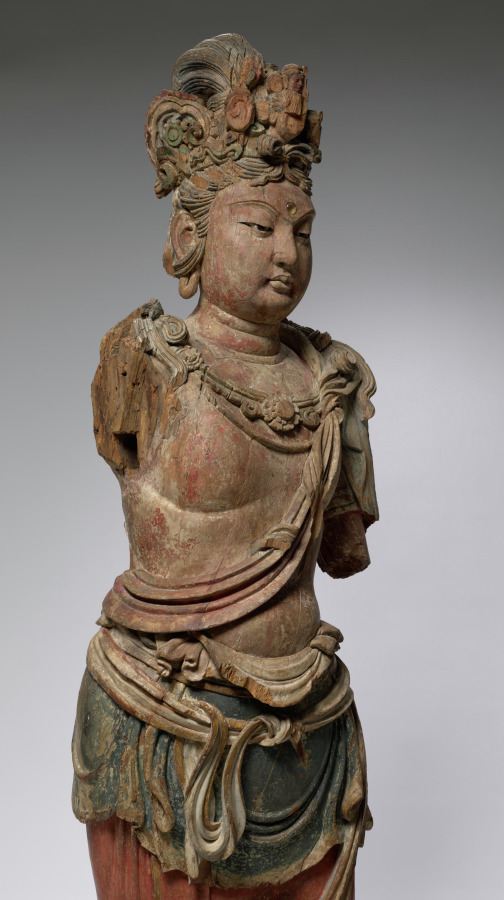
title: Eleven-Headed Guanyin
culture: China, late Northern Song dynasty (960-1127) - Jin dynasty (1115-1234)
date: 1100–1200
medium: wood with polychromy and cut gold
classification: Sculpture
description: The bodhisattva is an enlightened being dedicated to the spiritual awakening of all beings. The compassionate bodhisattva Guanyin, in a variety of manifestations, is probably the most popular deity of worship in Chinese Buddhism. In the Esoteric Buddhist form shown here, this standing Guanyin has a total of eleven heads, with smaller ones above the principal head. The uppermost head represents the Buddha Amitabha, to whom he is closely related. The eleven heads symbolize the Buddha’s steps on the path to enlightenment.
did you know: This Guanyin is carved from a single block of willow (genus Salix sp.).